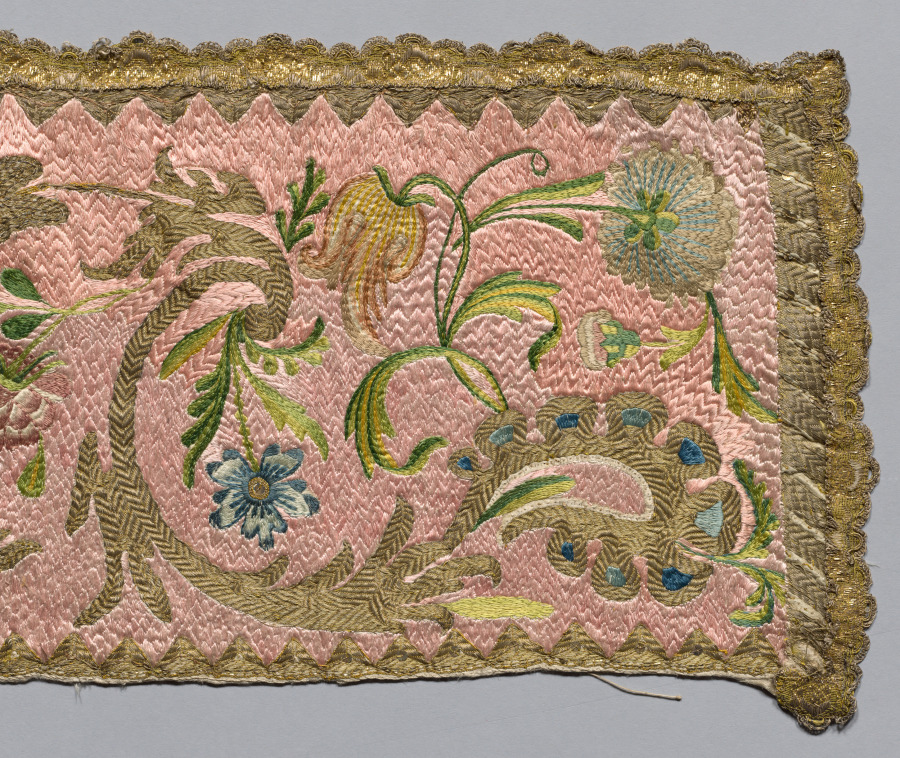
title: Embroidered Strip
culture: Italy, 18th century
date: 1700s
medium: embroidery, silk and gold thread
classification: Embroidery